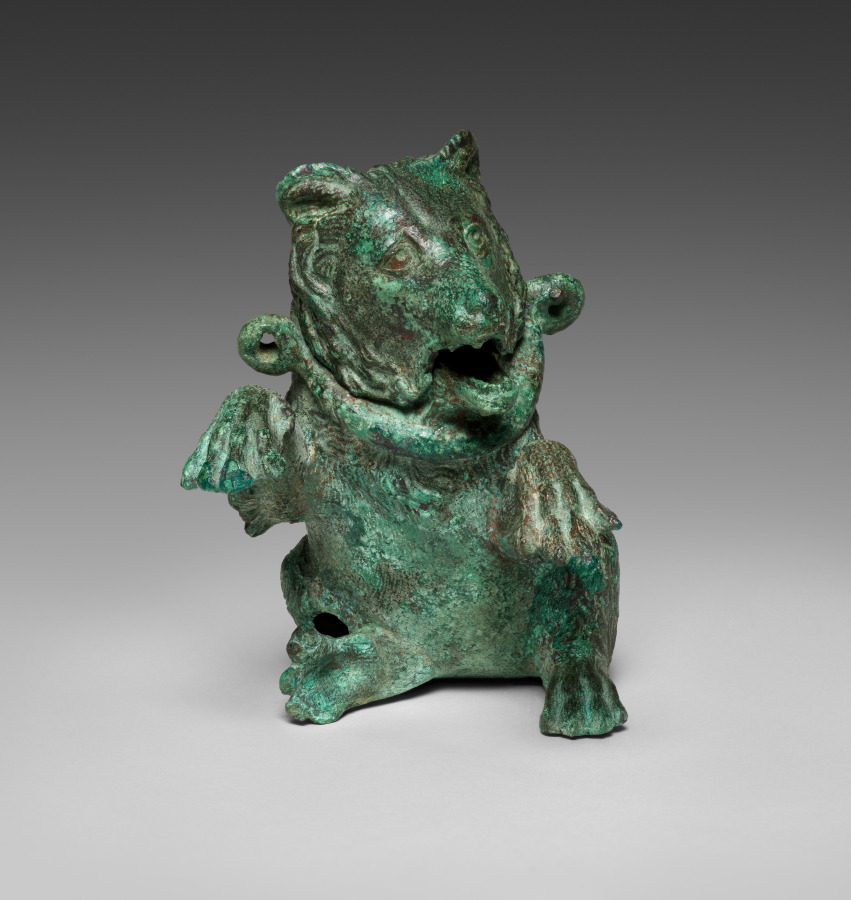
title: Oil Ampulla in the Form of a Dancing Bear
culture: Italy, Roman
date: 200s CE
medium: bronze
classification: Sculpture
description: This bronze bear sits on its hindquarters with its front paws raised, head slightly turned left, and mouth gaping open. It wears a collar around its neck with two rings on either side, where a chain would be passed through to suspend the ampulla. The bear’s head is hinged at the back of the collar to open the vessel, with the lower jaw forming a spout. The eyes were once pierced to prevent an airlock within the ampulla. Bears, like many other animals in antiquity, were used as a form of entertainment, demonstrated here by the bear’s “dancing” pose.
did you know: This ampulla was likely used to carry oil to the baths in antiquity.